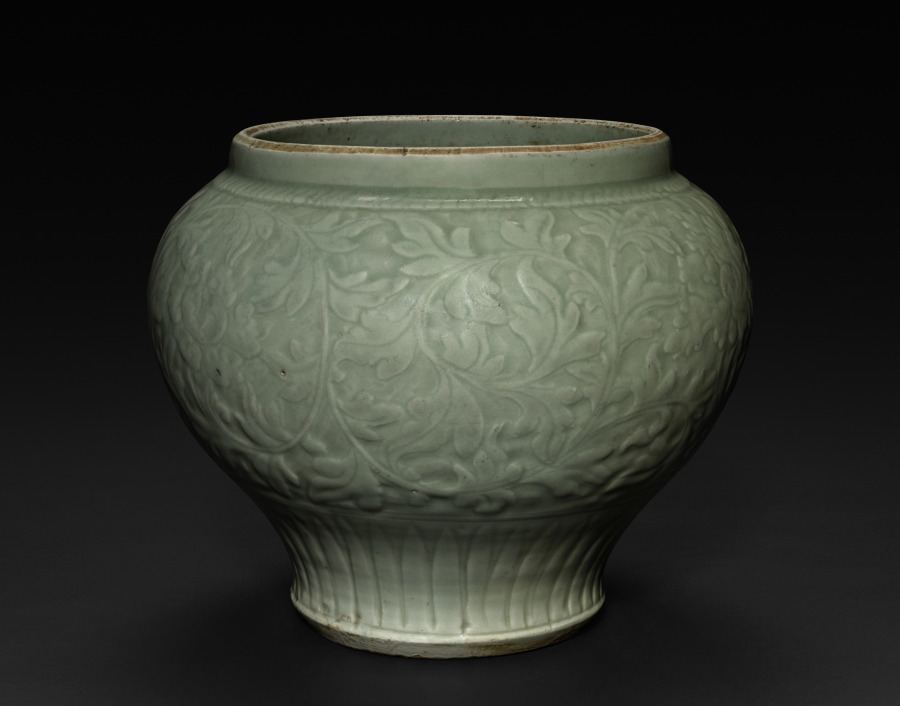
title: Jar: Celadon Ware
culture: China, Ming dynasty (1368–1644)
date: 1368–1644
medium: stoneware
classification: Ceramic